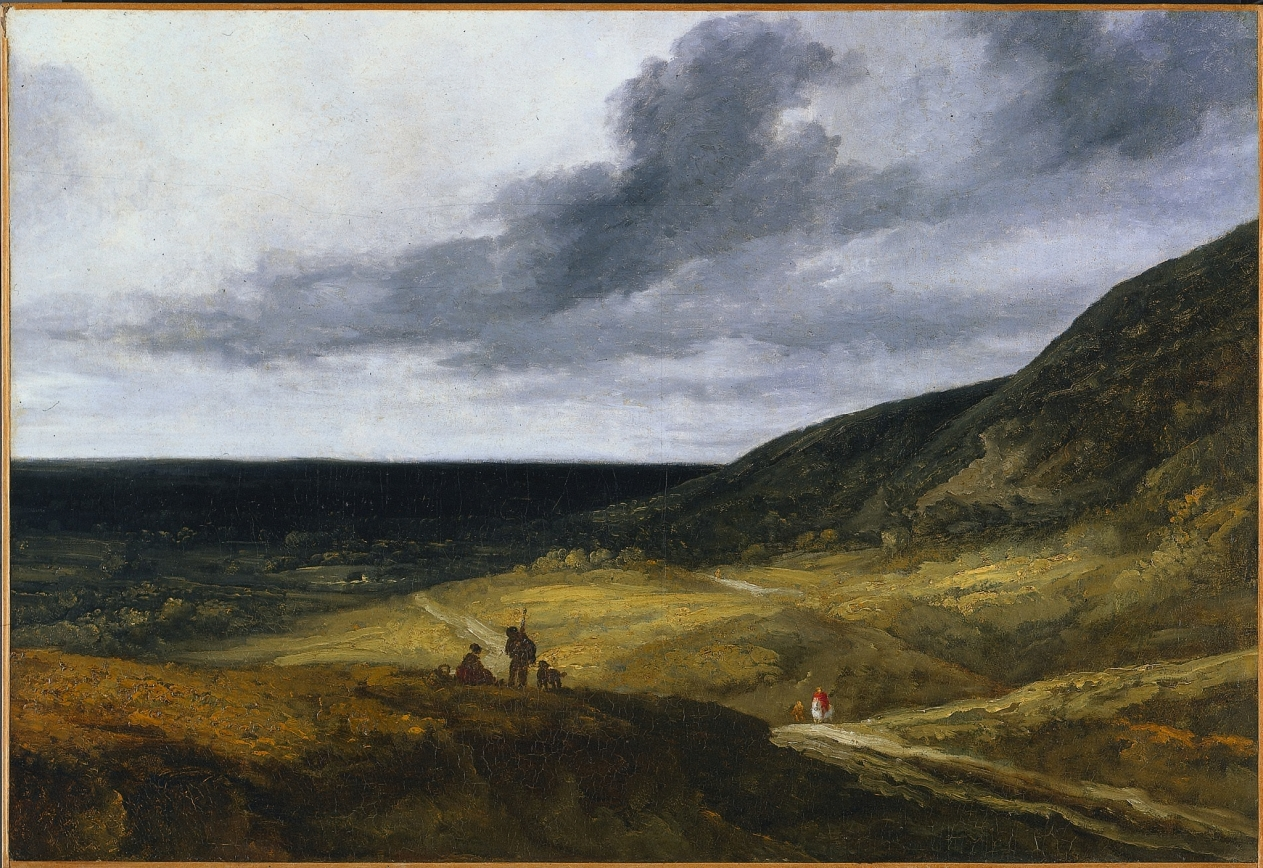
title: Landscape Near Paris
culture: France, 19th century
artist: attributed to Georges Michel (French, 1763–1843)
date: c. 1840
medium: oil on fabric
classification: Painting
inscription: Formerly signed and dated lower left (according to Minneapolis Institute of Arts, see note 2)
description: The location of this scene, probably near Paris, has not been identified with certainty. Unlike most painters of this time, Michel never traveled to Italy and focused only on depicting locations in France. Michel was always interested in Dutch art, however, and was nicknamed the "French Ruisdael"-a reference to the 17th-century Dutch landscape painter Jacob van Ruisdael (1628-1682). After about 1808, Michel explored personal interpretations of landscape, focusing on light, sky, and space. The brooding, vaguely threatening atmosphere in this painting embodies the Romantic notion that human beings are insignificant relative to the larger forces of nature.